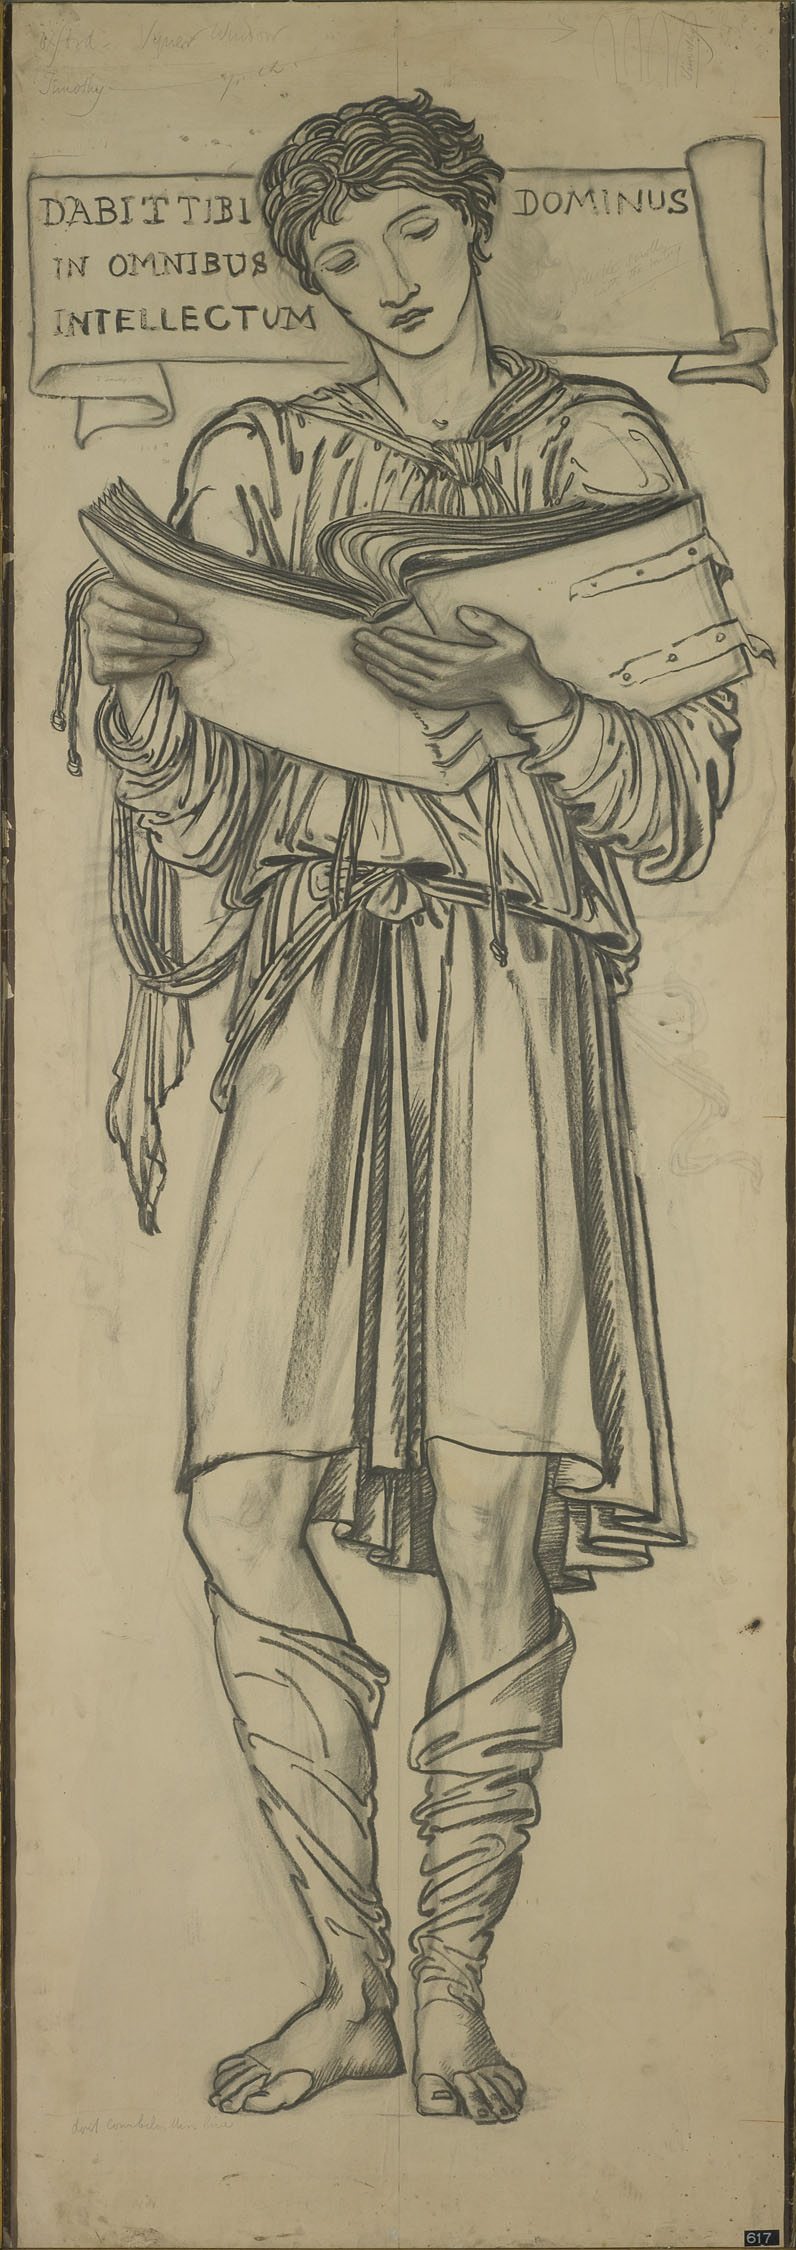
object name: Drawing and Watercolor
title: Timothy (Cartoon for Lady Chapel east window)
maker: Sir Edward Burne-Jones (English, 1833-1898)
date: March 1872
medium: Charcoal and pen and ink on paper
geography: England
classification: drawings (visual works); prints and drawing